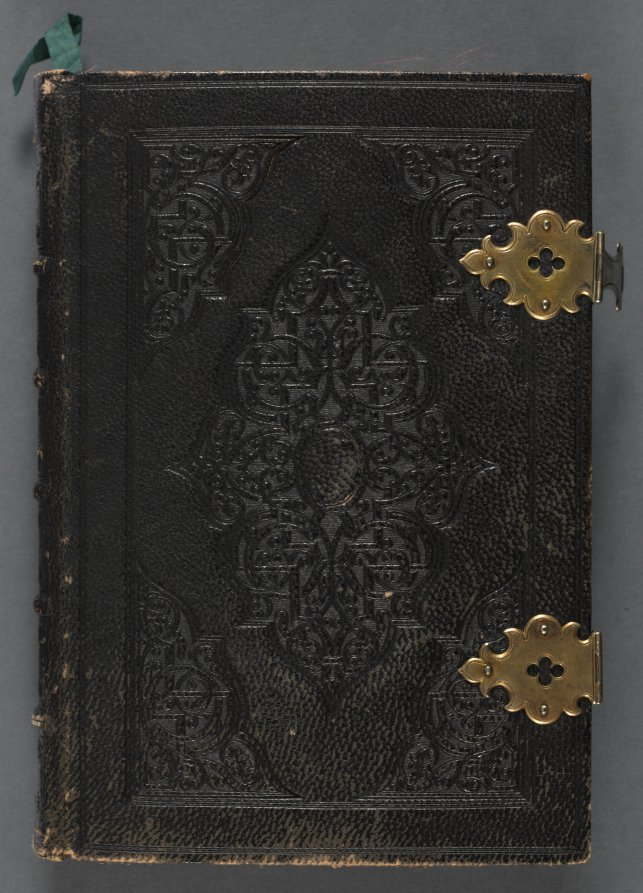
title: Book of Hours (Use of Paris)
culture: France, Paris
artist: possibly studio or workshop of The Bedford Master (French, Paris, active c. 1405–30)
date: c. 1420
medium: ink, tempera, and gold on vellum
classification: Bound Volume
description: The identity of the Bedford Master is not known. He is named for his work on two books produced for John of Lancaster, 1st Duke of Bedford, between 1415 and 1435. He was active in Paris and known to have been the head of a large and prolific workshop. The illuminator, one of the most innovative artists of his time, based his style on trends of the period around 1400.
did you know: Books of hours were the most abundantly produced book in the Middle Ages.